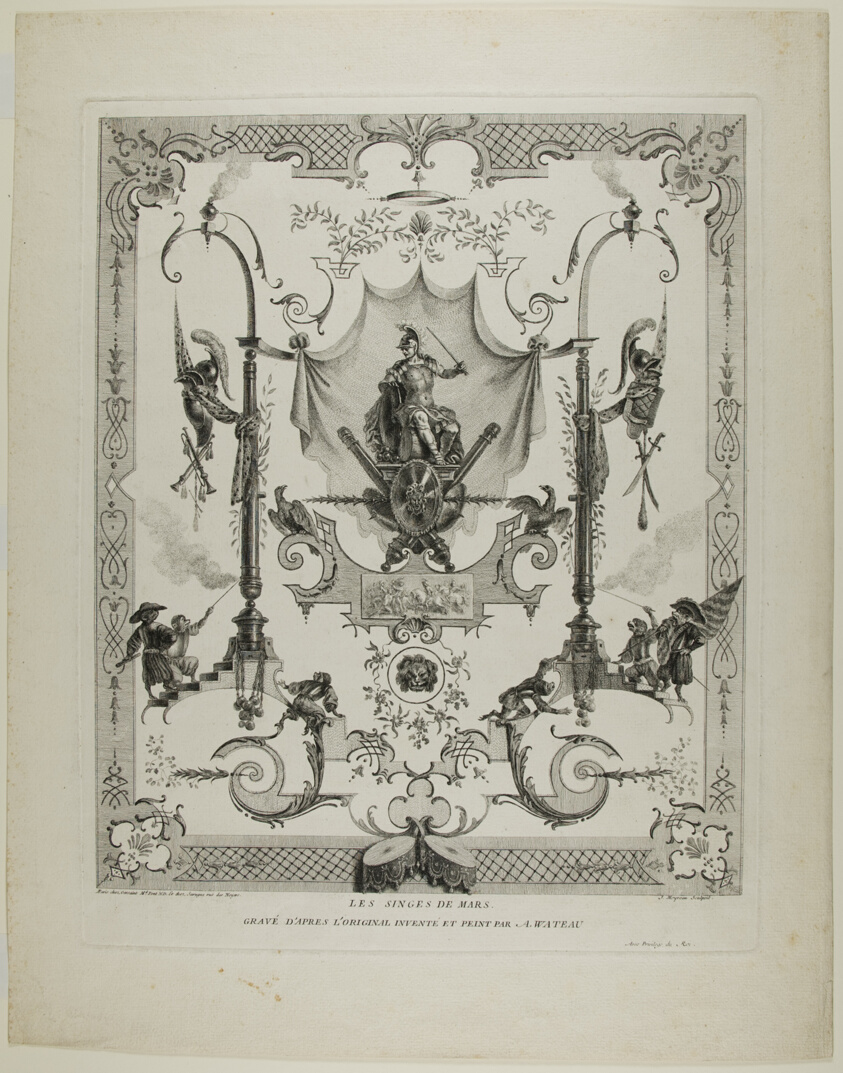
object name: Print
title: The Monkeys of Mars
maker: Jean Moyreau (French, 1690-1762); after Jean Antoine Watteau (French, 1684-1721)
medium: Etching on paper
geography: France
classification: etching; print; prints and drawing